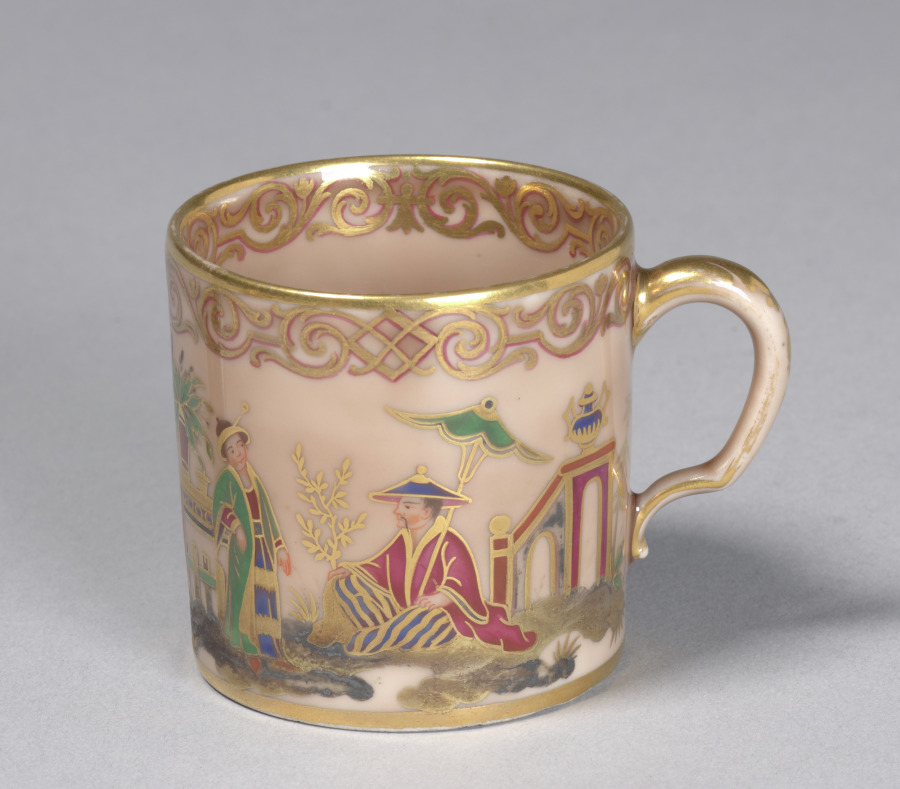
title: Cup (Gobelet litron)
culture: France, Sèvres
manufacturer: Sèvres Porcelain Factory (French, est. 1756)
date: 1778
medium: hard-paste porcelain with overglaze enamel decoration and gilt and silver decoration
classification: Ceramic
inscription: Interlaced Ls surmounted by a crown with date letters 'AA' enclosed; 'L.' below for Louis-François l'Ecot (in red)